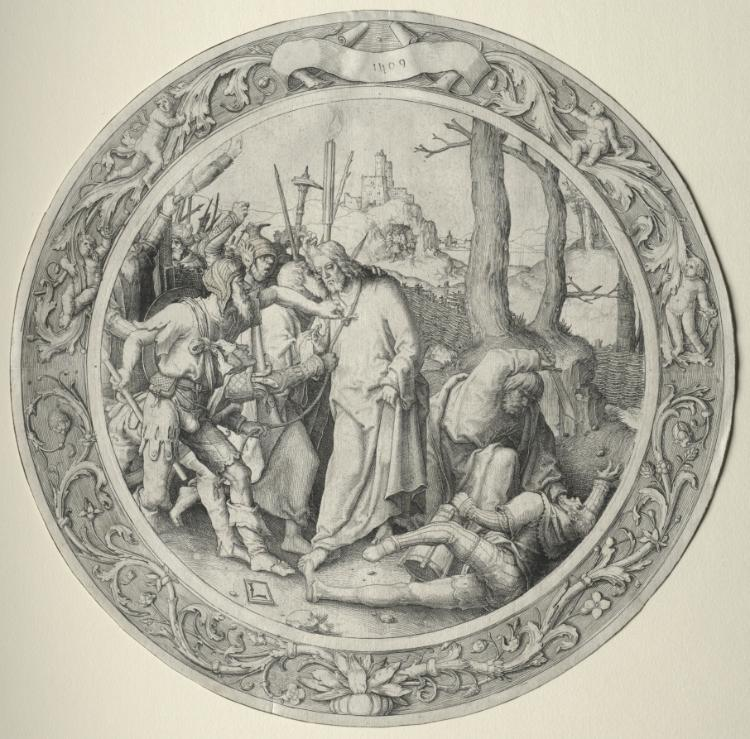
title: The Round Passion: The Betrayal of Christ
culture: Netherlands, 16th century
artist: Lucas van Leyden (Netherlandish, 1494–about 1533)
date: 1509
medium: engraving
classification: Print